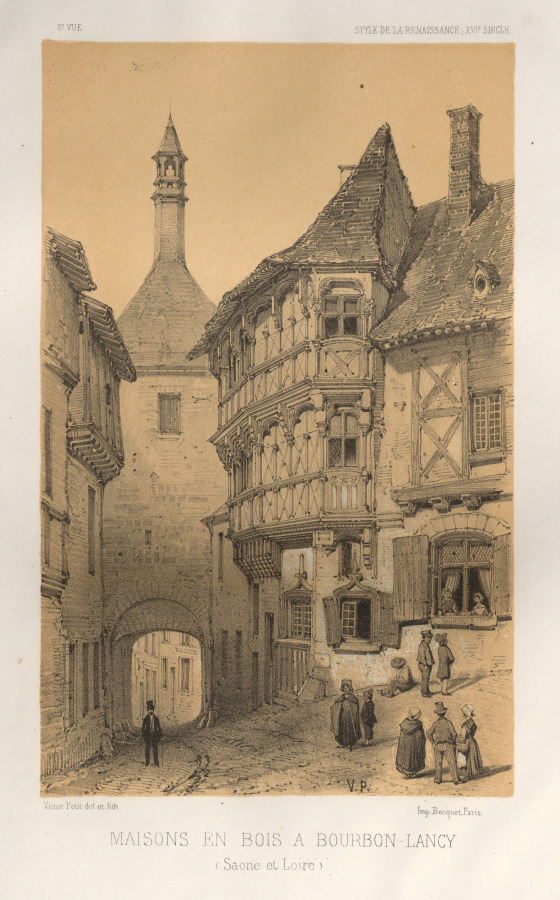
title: Architecture Pittoresque ou Monuments des xveme. Et xvieme. Siecles: Chateaux De France des XV et XVI Siecles: Pl. 5, Maison en Bois a Bourbon-Lancy (Saone Et Loire)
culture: France, 19th century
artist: Victor Petit (French, 1817–1874)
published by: Charles Boivin (publisher and editor); Lith de Godard a Paris (printer)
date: 1860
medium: lithograph with tint stone, from portfolio of 100 lithographs with tint stone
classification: Print